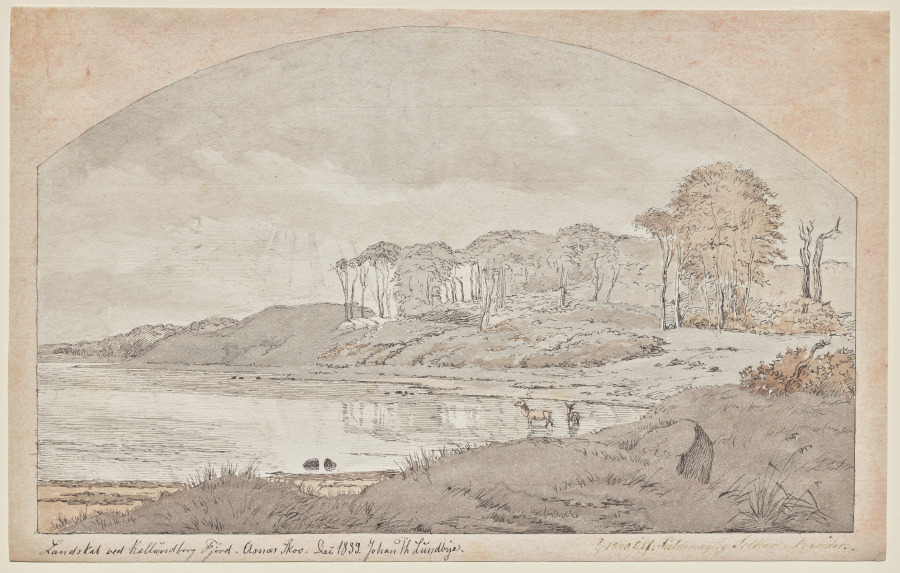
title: Asnæs Skov, Bay at Kalundborg Fjord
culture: Denmark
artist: Johan Thomas Lundbye (Danish, 1818–1848)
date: 1839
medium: Pen and black ink and gray and brown ink washes with arched framing line in pen and black ink, bordered in pink watercolor on modern cream laid paper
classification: Drawing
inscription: Inscribed and signed, black ink, lower left: Landskab ved Kallundborg Fjord. Asnæs Skov. Dec 1839. Johan Th Lundbye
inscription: inscribed, black ink, lower right: 2/1 1840 tilf. Fuldmagtig Secher i Kanders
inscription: Stamped, on verso, black ink, lower left: mark of Kunstforeningen (Lugt 988c)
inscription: inscribed, ink, lower left: Kunstforeningen København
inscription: inscribed, pencil, at center: 2/1 40 [illeg.] Secher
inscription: inscribed, pencil, lower right: 10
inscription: Watermark, at center: C&I HONIG / XX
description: Johan Thomas Lundbye belonged to the youngest generation of artists working during Denmark’s Golden Age, a period of unprecedented creative activity. This drawing depicts a wooded area on a narrow bay near the town where the artist grew up. Lundbye worked outdoors, directly from nature, aiming to create a work that conveyed his experience of nature. With exacting precision, he conveyed the scene’s solitude and featured a large dolmen, meant to allude to the region’s ancient past.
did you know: Copenhagen’s Kunstforeningen, an exhibition society for contemporary art, purchased this drawing from Lundbye shortly after its creation—a practice meant to extend the organization’s support of artists.